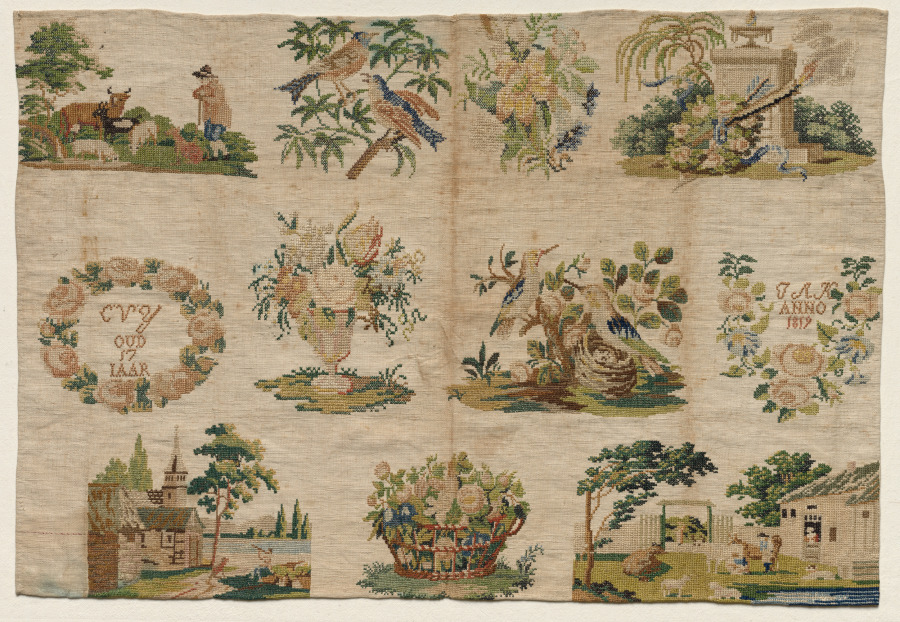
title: Sampler Fragment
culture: Netherlands, early 19th century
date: 1819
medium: embroidery; silk on linen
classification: Sampler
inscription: two inscriptions enclosed in wreaths: "C.V.Y./ OUD/ 17/ IAAR"; "T.R.K./ ANNO/ 1819."